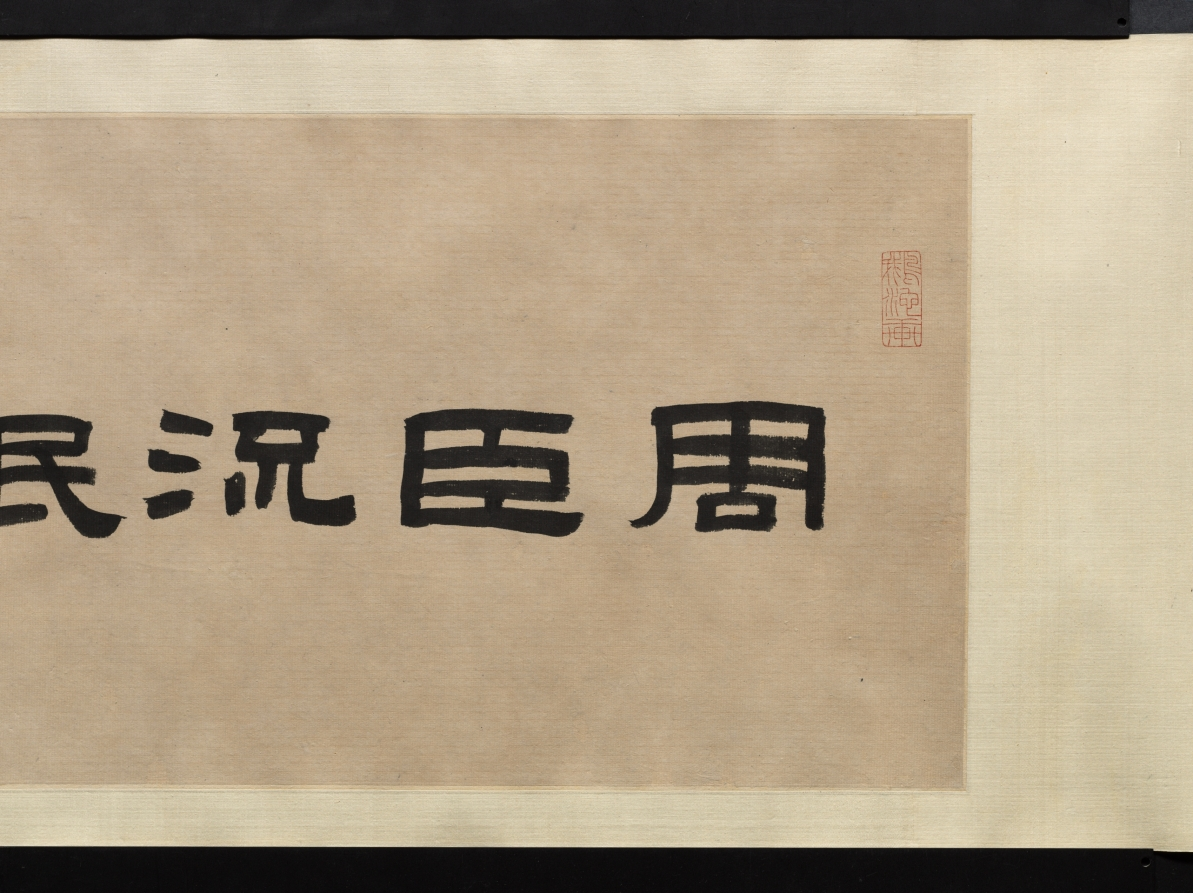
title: Beggars and Street Characters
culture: China, Ming dynasty (1368–1644)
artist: Zhou Chen (Chinese, c. 1450–c. 1536)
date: 1516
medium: Handscroll; ink and light color on paper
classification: Painting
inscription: 題: 周臣流氓圖. 古堇趙鶴琴 [印] 老鶴臨池; 鵝池軒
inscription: 正德丙子秋七月，閒窗無事 ，偶記素見市道丐者種種態度。乘筆硯之便，率爾圖寫。雖無足觀，亦可以助警勵世俗云。 東邨周臣記 [印]東邨; 舜卿; 鵝場散人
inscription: 吳中東邨周君，善丹青，尤長於人物。此圖其所見盛市丐者之狀種種，各盡其態，觀者絕倒。嗟乎，今之晝夜乞哀以求富貴者，安得起周君而貌之耶。臥雲徵君出示，余漫題其後。 甲子歲十月吳門黃姬水 [印] 士雅山人; 另一印不詳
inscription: 是冊凡數種。其飢寒流離疲癃殘疾之狀，種種之異。觀此而不惻然心傷者，非仁人也。計正德丙子逆瑾之流毒已數年。而[江]彬 [錢] 寧輩肆虐方熾。意分符剖竹諸君，亦鮮有能撫字其民者。然則舜卿此作，殆與鄭君 流民圖同意。其有補於治道者不淺，要不可以墨戲忽之也。 長洲張風翼題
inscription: 東村此筆，蓋圖寫飢寒乞丐之態，以警世俗耳。而質山 [黃姬水]欲其寫昏夜乞哀，而靈墟[張鳳翼]則擬之於安上門圖。二君之見，其各有所指哉。昔唐六如每見周筆，輒稱曰：周先生！蓋深服其神妙之不可及。若此冊者，信非他人可能而有符於六如之心伏矣。豈易得耶。若黃、張之指，則又論於畫之外，不在於形似筆墨之旨也。 萬歷丁丑十二月三日 茂苑文嘉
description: Zhou Chen from Suzhou provides rare depictions of impoverished people that once filled the city’s markets and streets. Despite Suzhou’s prosperity, its rapid growth polarized society, including the wealthy and those who had deserted their farmlands, who were without homes, unemployed, or sick. Amid these are figures who inspire fear rather than empathy. The painting may thus be informed by local practices at the end of the lunar year, in which street beggars, in exchange for food or money, would dress up like ghosts and demons to drive out evil forces.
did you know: Although Zhou Chen's original composition was an album of 24 figures, today it is mounted as two handscrolls, one in the Cleveland collection and one in the Honolulu Museum of Art.